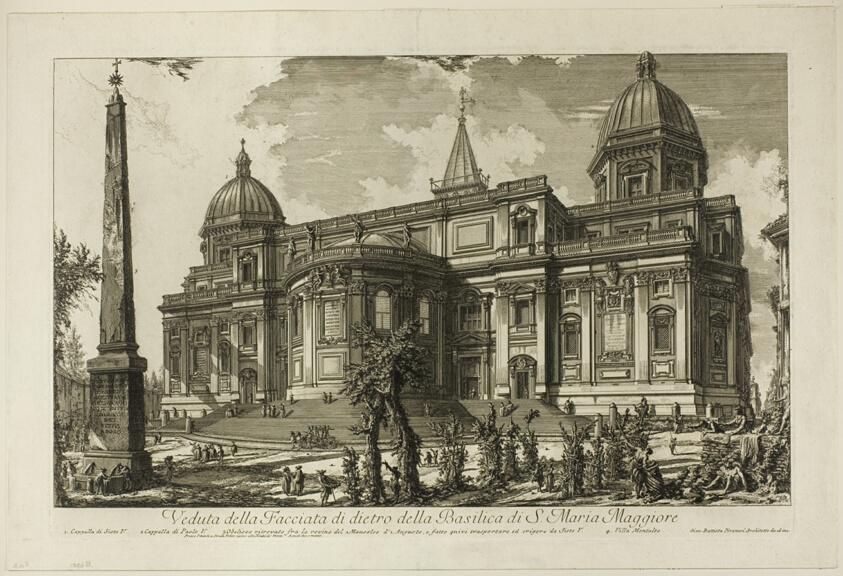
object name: Print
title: View of the Rear Entrance of the Basilica of S. Maria Maggiore, from Views of Rome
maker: Giovanni Battista Piranesi (Italian, 1720-1778)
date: 1750/59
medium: Etching on heavy ivory laid paper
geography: Italy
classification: etching; print; prints and drawing